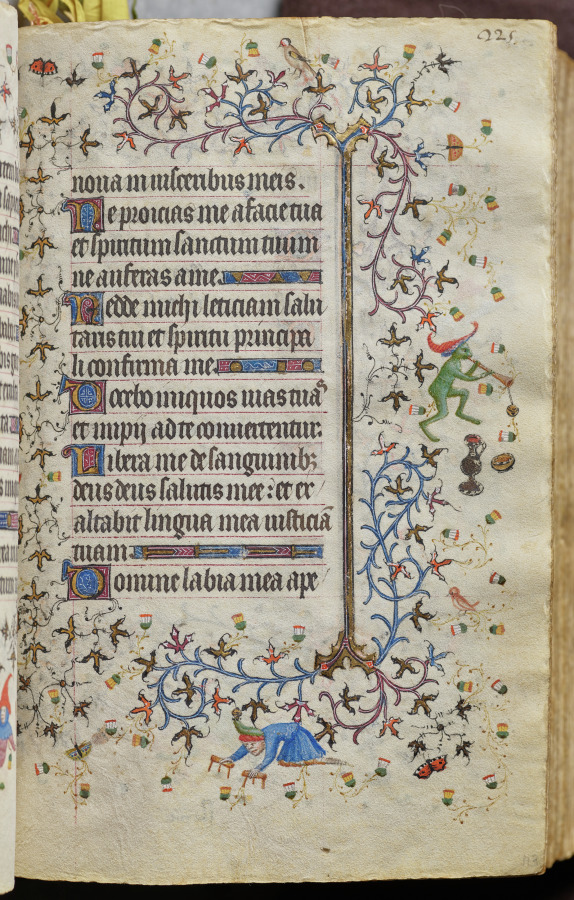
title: Hours of Charles the Noble, King of Navarre (1361-1425): fol. 113r, Text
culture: France, Paris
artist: Master of the Brussels Initials and Associates (French)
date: c. 1405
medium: ink, tempera, and gold on vellum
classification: Bound Volume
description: This precious volume was obviously highly prized by its owner, the French-born King of Navarre, who had his coat of arms painted on no less than twenty folios. Rather than directly commissioning this manuscript from a specific workshop, it seems that Charles the Noble acquired his book of hours -- perhaps ready-made for the luxury market -- while on a trip to Paris in 1404-05. A collaborative effort, six painting styles are evidenced within the pages of this codex, those of two Italians, two Frenchmen, and two Netherlanders. The painter who was responsible for the planning and decoration of the book, and who produced seventeen of the large miniatures, was a Bolognese artist known as the Master of the Brussels Initials. His principal assistant, responsible for most of the borders, was a Florentine who signed his name "Zecho" da Firenze on folio 208 verso.